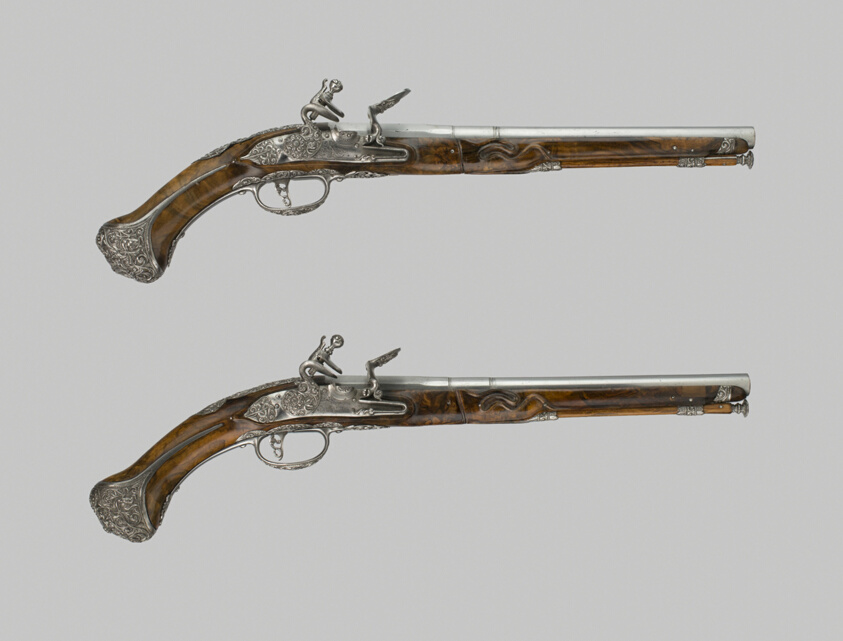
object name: Arms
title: Pair of Flintlock Holster Pistols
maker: Italian, Gardone Val Trompia; Barrels by Vicenzo Cominazzo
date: c. 1680/90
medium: Steel and wood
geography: Italy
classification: firearm-handgun; arms; arms and armor